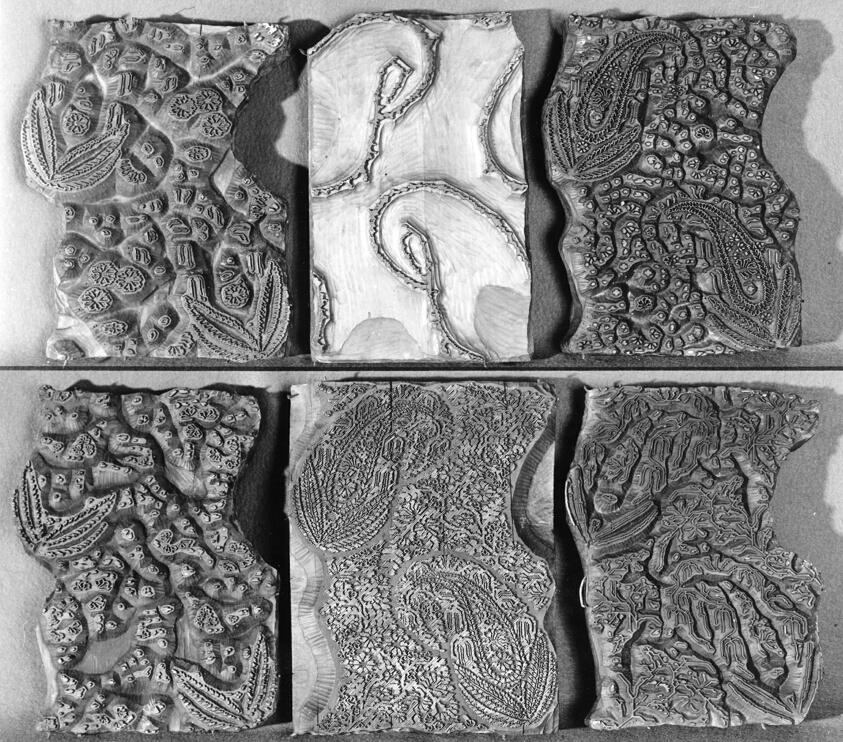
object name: Textile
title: Six Printing Blocks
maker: England or France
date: before 1850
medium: Carved wood, treated in a variety of techniques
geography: England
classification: printing blocks (printing surfaces); textile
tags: paisley